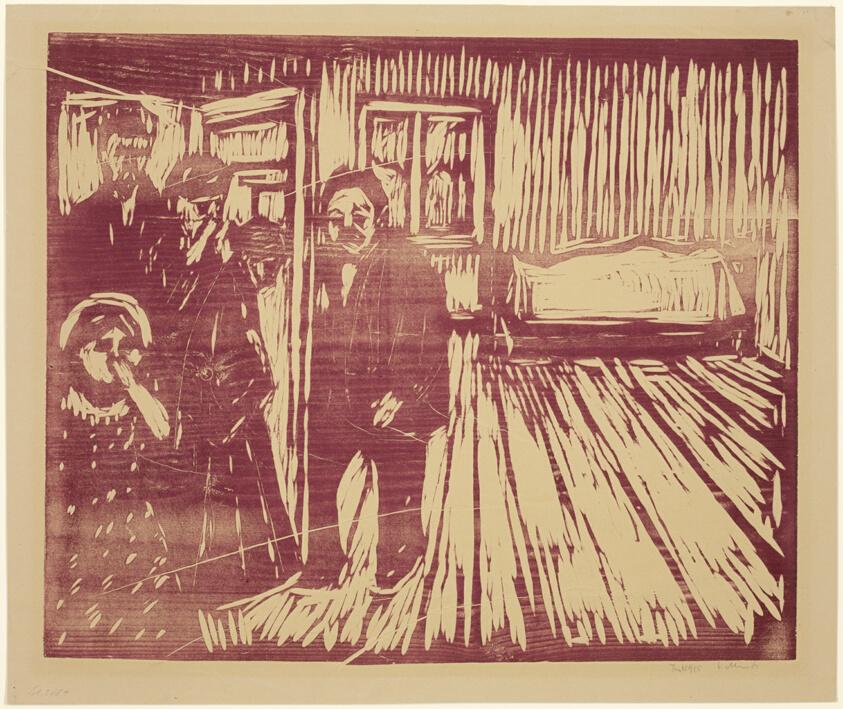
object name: Print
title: The Smell of Death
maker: Edvard Munch (Norwegian, 1863-1944)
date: 1915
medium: Woodcut on paper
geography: Norway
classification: woodcut; print; prints and drawing